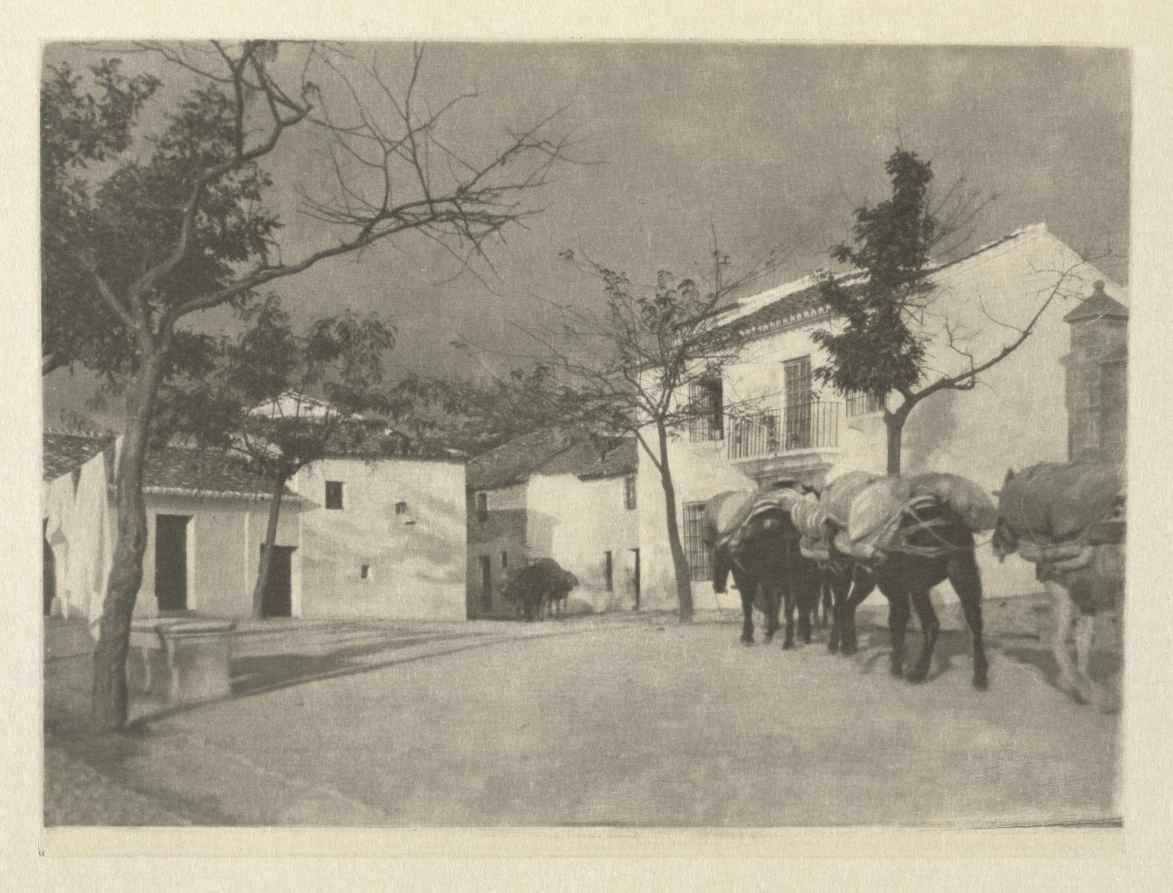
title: Camera Work: A Square - Ronda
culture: England, 20th century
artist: J. Craig Annan (British, 1864–1946)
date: 1914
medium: photogravure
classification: Bound Volume